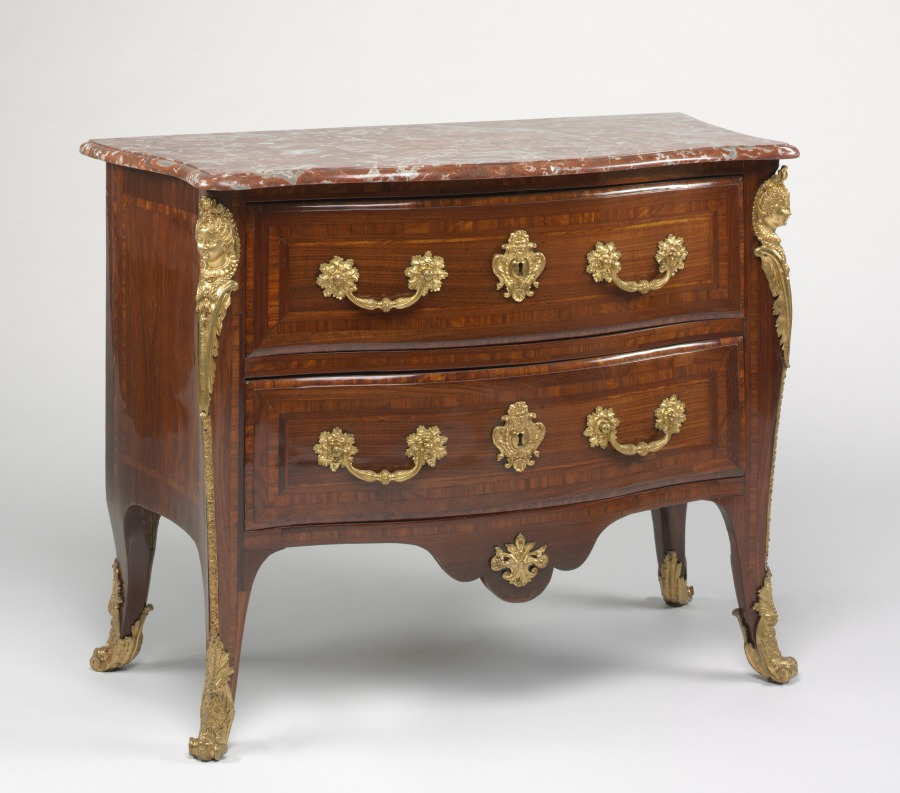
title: Chest of Drawers (Commode)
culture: France, Paris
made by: attributed to Etienne Doirat (French, c. 1670–1732)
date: c. 1725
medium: kingwood with gilt-metal mounts, marble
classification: Furniture and woodwork